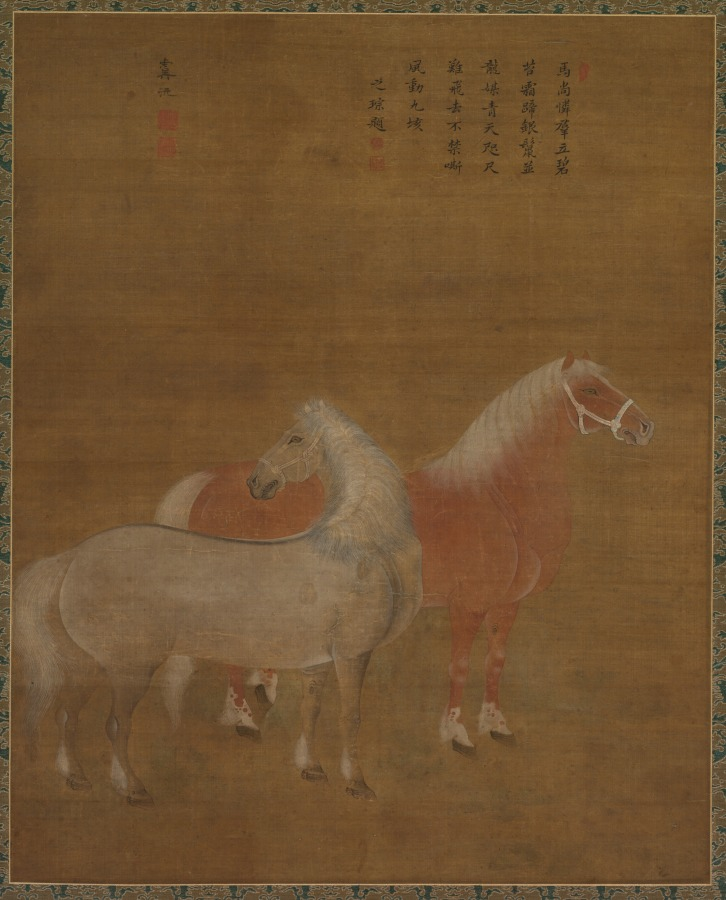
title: Two Horses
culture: China, Qing dynasty (1644-1911)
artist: attributed to Yu Yuan (Chinese, active 1700s)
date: 1644–1911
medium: Hanging scroll; ink and color on silk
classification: Painting